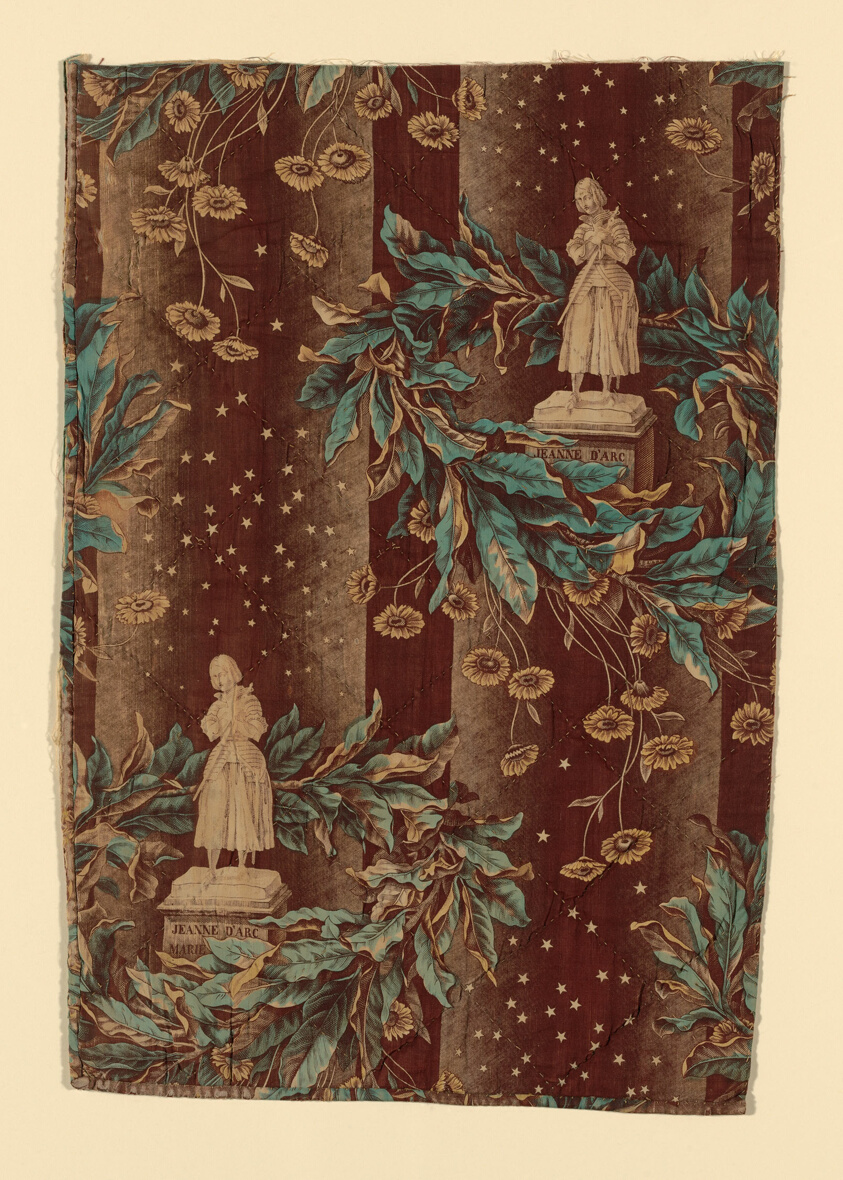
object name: Textile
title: Jeanne d'Arc (Joan of Arc)(Furnishing Fabric)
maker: After a sculpture by Marie Christine d'Orléans (French, 1813–1839); France, Alsace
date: 1839/40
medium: Cotton, plain weave; engraved roller and block printed; quilted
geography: France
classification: textile; weaving - printed; furnishing textile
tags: propaganda, saints, flowers, foliage, women